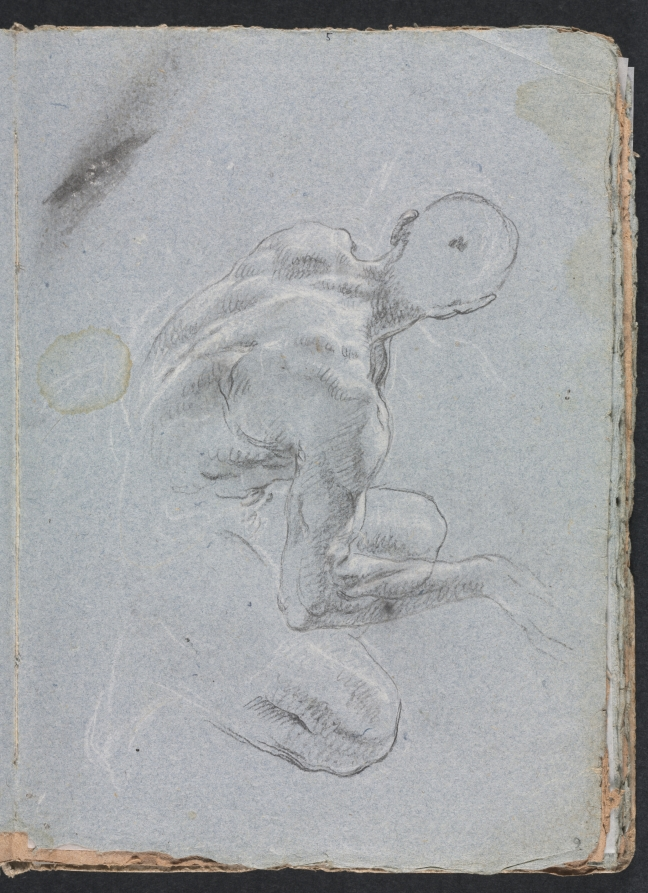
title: Verona Sketchbook: Male nude from back (page 9)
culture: Italy, 18th century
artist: Francesco Lorenzi (Italian, 1723–1787)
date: 1760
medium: black chalk with white heightening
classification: Bound Volume